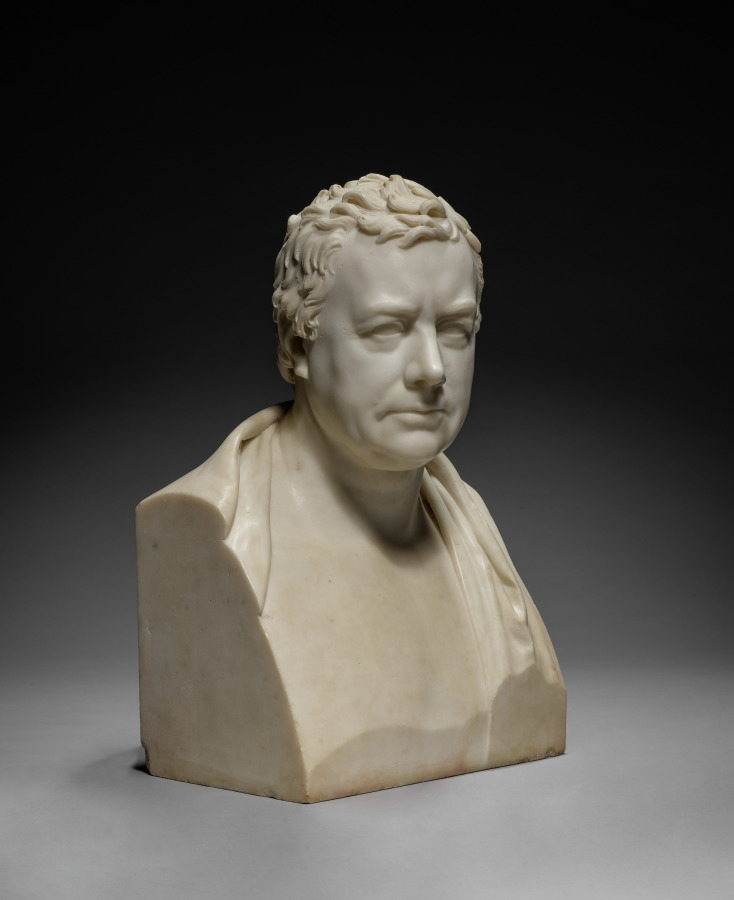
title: Sir H. C. Englefield, Bart.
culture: England, 19th century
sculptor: Francis Legatt Chantrey (British, 1781–1841)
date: 1818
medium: marble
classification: Sculpture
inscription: inscribed left side: Chantrey/Sculptor/1818; rear: Sir H. C. Englefield, Bart.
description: To modern eyes, a bare-chested portrait of a man in his mid-60s might seem undignified. However, it was fashionable for gentlemen of Englefield’s generation to be portrayed in this manner, deliberately referencing the antique sculptures of Roman statesmen they admired. As a Catholic, Englefield was barred from taking part in politics in England; however, he was a member of several clubs devoted to the amateur study of art, science, and history. Among these were the Society of Dilettanti, which championed the works of antiquity and promoted the creation of modern art in the same spirit—like this marble bust by celebrated sculptor Francis Legatt Chantrey.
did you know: Initially, Chantrey tried to establish himself as a portrait painter. After 1805, he painted only on occasion and from 1811–20, he became the leading portrait sculptor in Regency Era Great Britain.